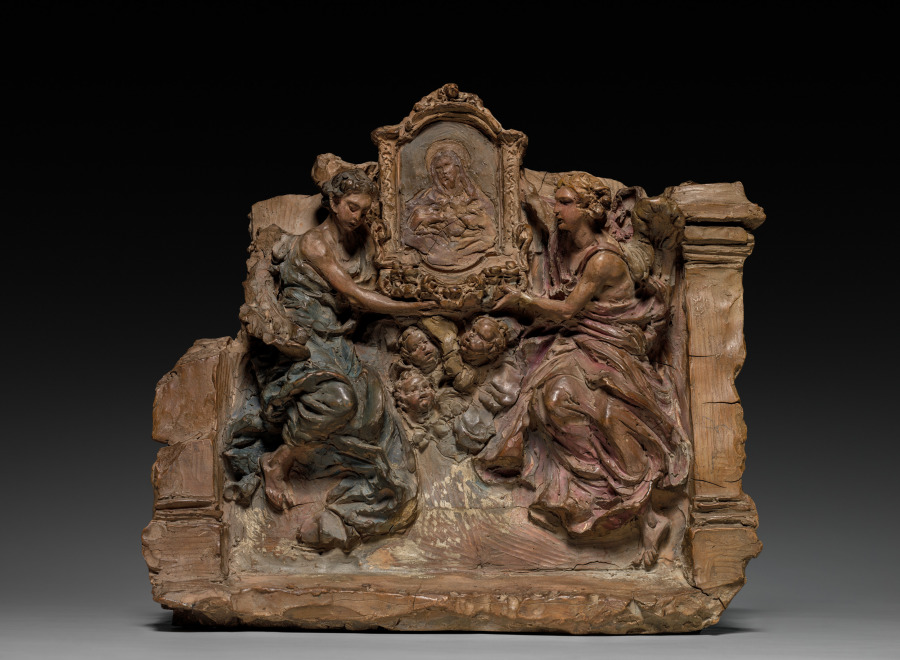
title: Two Angels and Cherubs Bearing an Icon of Christ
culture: Italy, Rome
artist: probably by Paolo Naldini (Italian, 1616–1691)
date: c. 1670–80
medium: terracotta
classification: Sculpture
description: This work is probably a study for a large altarpiece that would have combined several materials, including marble, stucco, and paint. The artist modeled his design in soft clay, which was then hardened by firing; subtle tints suggest the richness of the finished work. The idea of using sculptural figures to support a painted image within an altarpiece was influenced by the work of the Roman sculptor Gian Lorenzo Bernini (1598–1680), with whom Naldini is known to have worked.